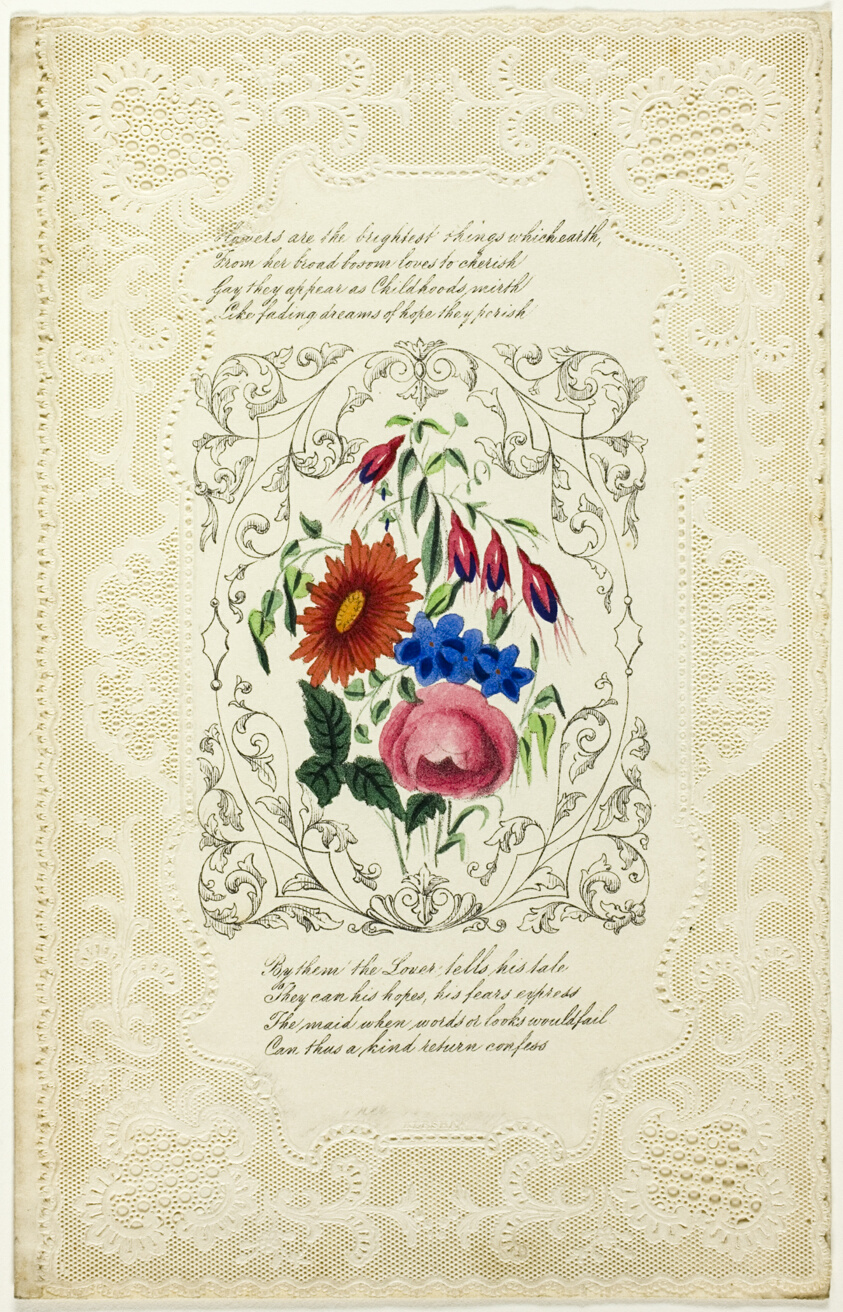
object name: Print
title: Flowers are the Brightest Things (valentine)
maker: George Kershaw (English, 19th century)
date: 1855/60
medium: Lithograph with hand-coloring on cut and embossed ivory wove paper (lace)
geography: England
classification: collage; valentine; prints and drawing; print